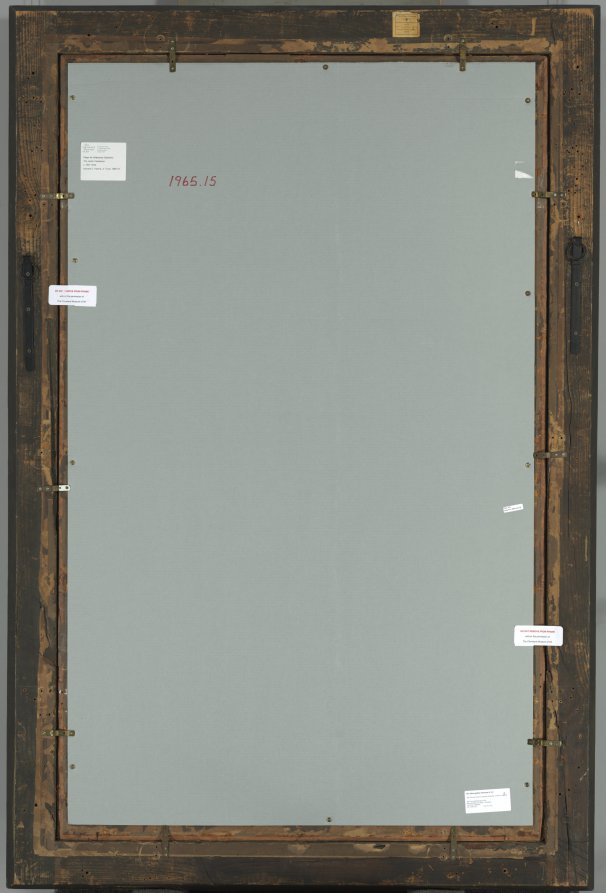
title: Portrait of the Jester Calabazas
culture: Spain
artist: Diego Velázquez (Spanish, 1599–1660)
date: c. 1631–32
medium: oil on canvas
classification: Painting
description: Calabazas, a jester in the court of King Philip IV of Spain, had physical and mental disabilities, a state that the artist emphasizes, rather than tries to hide. While the Spanish court prized and doted upon people with disabilities such as Calabazas, Velázquez transformed their depiction in portraiture. This startling work uses the format of the formal, full-length court portrait to present a type of person who was generally perceived as marginal at this point in history and profoundly humanizes him.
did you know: Calabazas holds a wind-driven pinwheel and a miniature portrait of a woman, together suggesting the inconstancy of love.